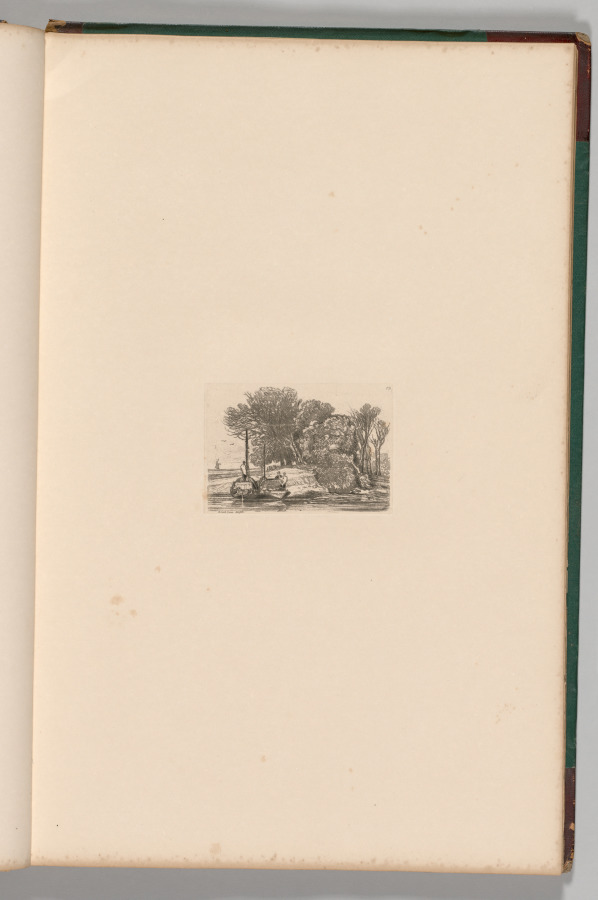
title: Liber Studiorum: Plate 19, Postwick Grove, Norfolk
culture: England, 19th century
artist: John Sell Cotman (British, 1782–1842)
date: 1838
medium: softground etching, from a bound volume containing 48 plates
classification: Bound Volume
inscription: In plate, within image, upper right: 19; in plate, below image: Postwick Grove, Norfolk